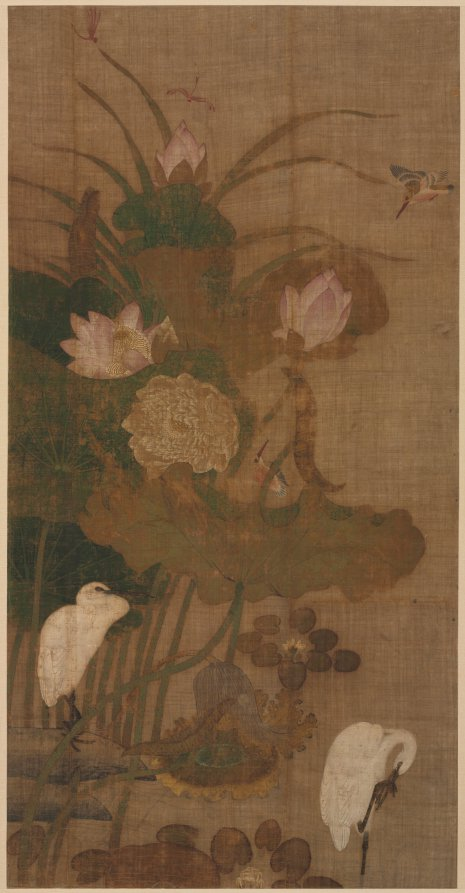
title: Lotuses, Insects, and Birds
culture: Korea, Joseon dynasty (1392–1910)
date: 1800s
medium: hanging scroll; ink and color on silk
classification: Painting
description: Pairs of herons, kingfishers, and dragonflies punctuate a profusion of lotus in this composition that, given the orientation of the herons and the clustering of motifs in the left-hand side of the work, may have once been the left painting of a pair. Given its subject matter, this hanging scroll may have been hung for display during the summer.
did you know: Given its subject matter of lotus flowers, herons, kingfisher, and dragonflies, this hanging scroll may have been hung for display during the summer.